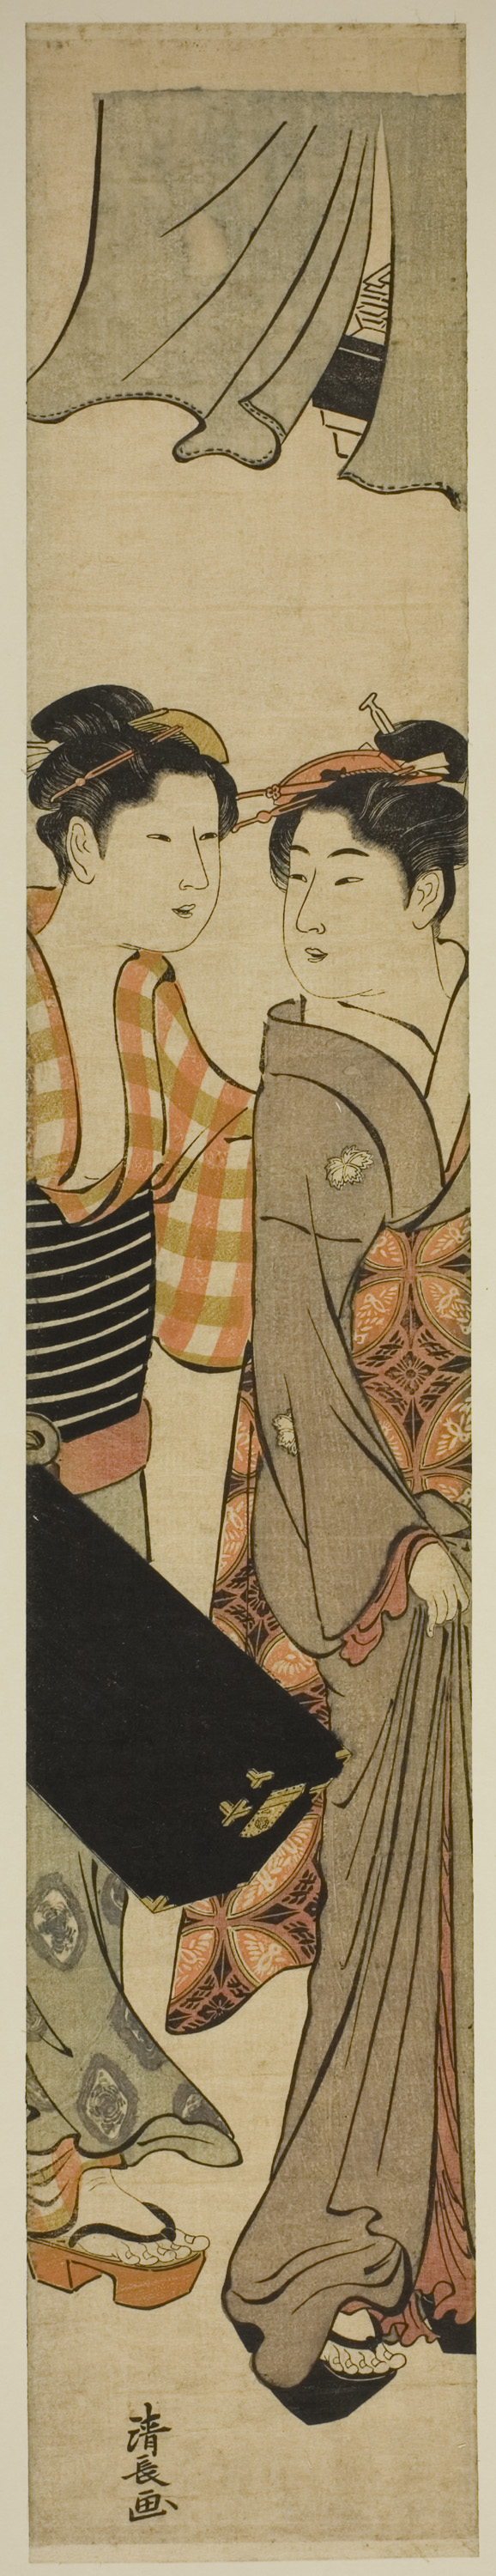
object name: Print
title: Geisha and Her Maid Carrying a Shamisen Box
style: Japanese (culture or style)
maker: Torii Kiyonaga (Japanese, 1752-1815)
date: c. 1781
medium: Color woodblock print; hashira-e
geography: Japan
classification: woodblock print; print; asian art